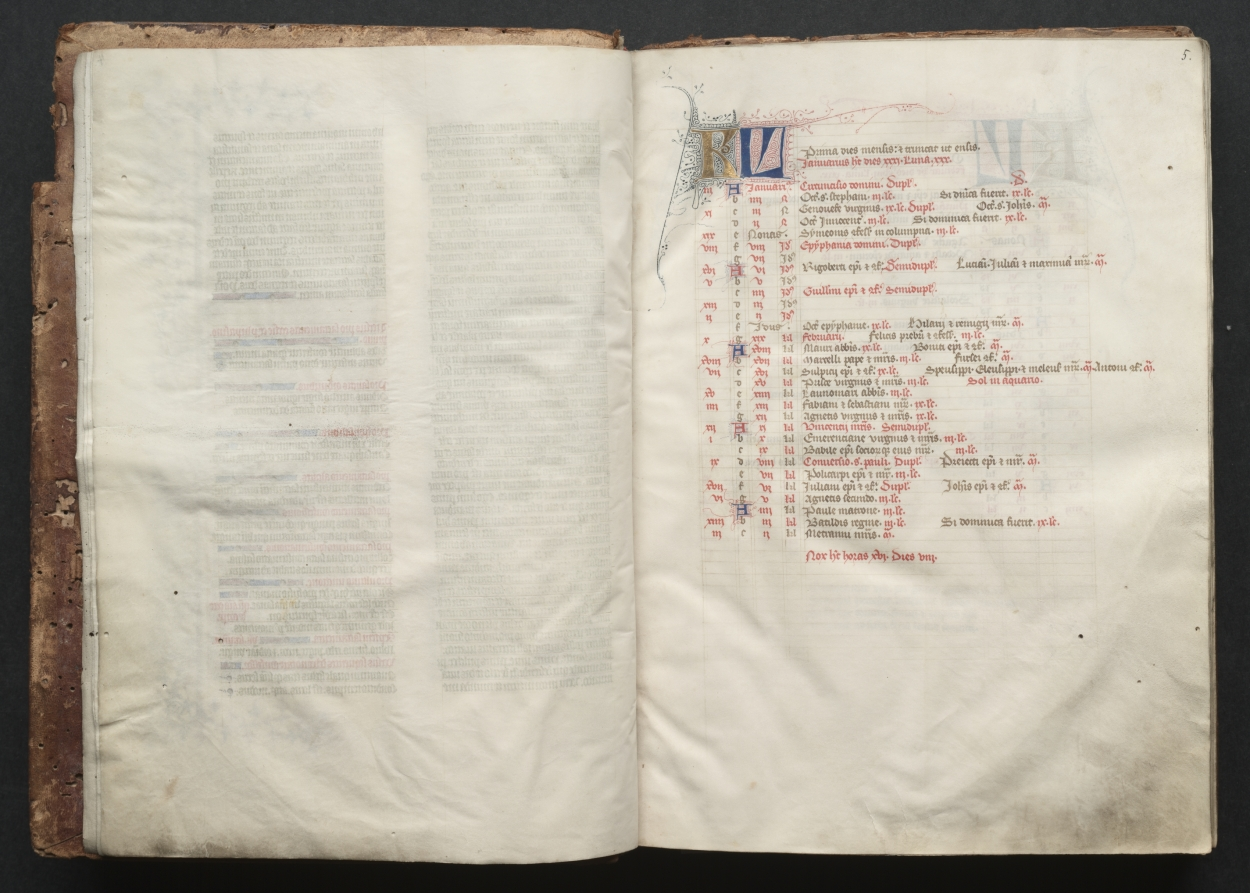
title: The Gotha Missal: Fol. 4v, Text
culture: France, Paris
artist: Master of the Boqueteaux (French)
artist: and Workshop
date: c. 1375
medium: ink, tempera, and gold on vellum; blind-tooled leather binding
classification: Bound Volume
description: The style and quality of this manuscript's decoration is typical of deluxe Parisian books made for aristocratic or royal patrons. Most of the book's decoration appears to be the work of the Master of the Boqueteaux, an artist active at the court of King Charles V (died 1380). His style was apparently shared by a number of book illuminators working in and around Paris. It is very possible that the Gotha Missal belonged to Charles V, but is not provable because the manuscript has no royal portraits and lacks a colophon. Given the book's magnificent decoration, however, it would seem that it was produced for a Valois prince, if not for the king himself. The manuscript receives its name from the German dukes of Gotha, its later owners.